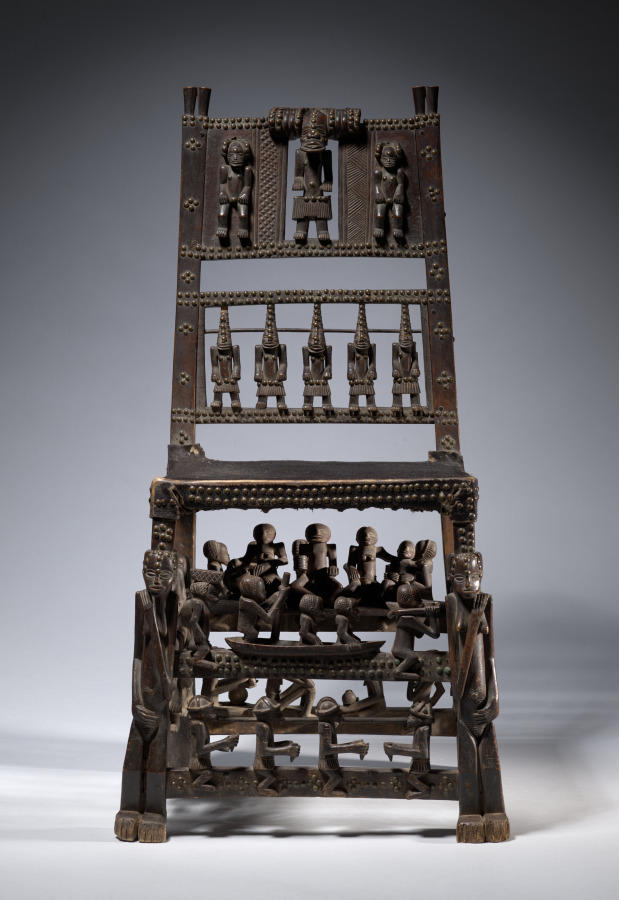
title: Ceremonial Chair or Throne (citwamo ca mangu)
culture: Africa, Central Africa, Angola, Chokwe-style carver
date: 1800s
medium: Wood, upholstery studs, leather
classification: Furniture and woodwork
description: This citwamo ca mangu chair bears over 40 sculpted figures arranged in complex compositions across the chair’s top rail (back), stretchers (rungs), and legs; all symbolize the power of Chokwe supreme chiefs. Such chairs typically bear a dozen or fewer figures. Scenes of royal life and power wrap around the seat, reinforcing how the chief and his family are at the center of their polity and its business.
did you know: Starting around the 1500s, Chokwe and other African leaders and traders received fine chairs as gifts from Portuguese traders. Chokwe leaders adapted this symbol of power as their own, using it in tandem with stools, an earlier kind of prestige seat.